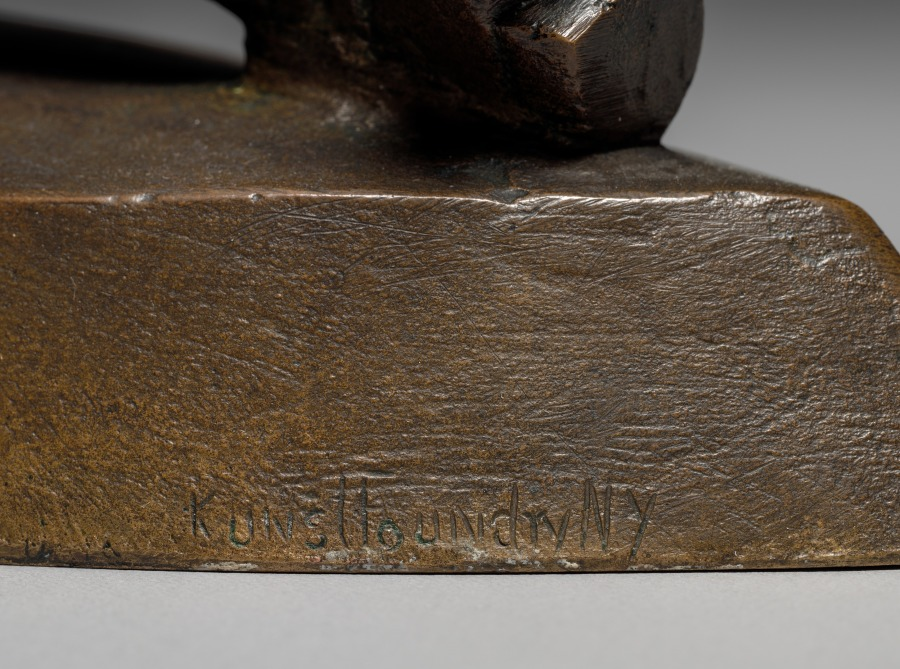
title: Balalaika Player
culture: America, Ohio, Cleveland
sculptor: Alexander Blazys (American, born Russian Empire [now Lithuania], 1894–1963)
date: 1925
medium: bronze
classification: Sculpture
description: A Lithuanian immigrant, Blazys introduced modernist sculpture to Cleveland upon his arrival in 1925. These figures merge rhythmic movement inspired by music with faceted, geometric planes derived from Cubism.